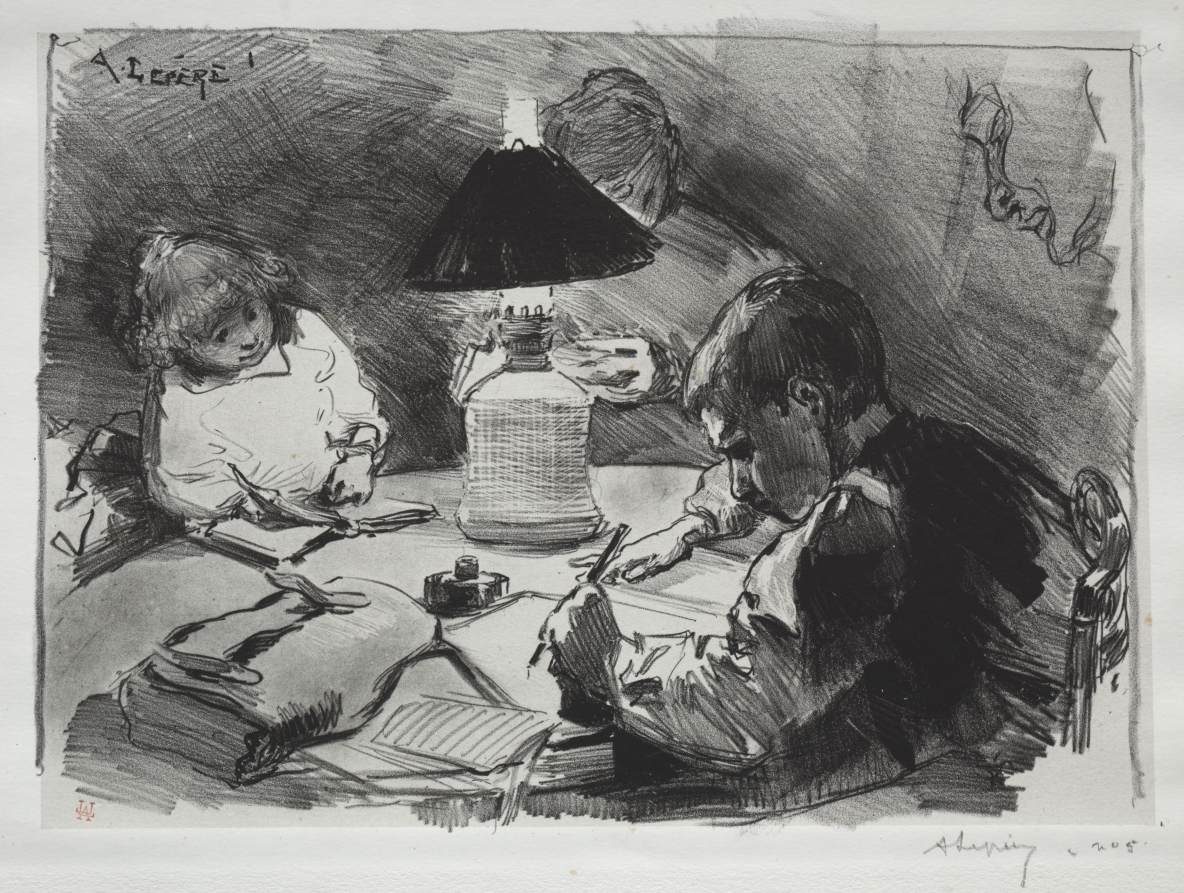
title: Around the Lamp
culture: France, 19th century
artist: Auguste Louis Lepère (French, 1849–1918)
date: 1891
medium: lithograph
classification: Print